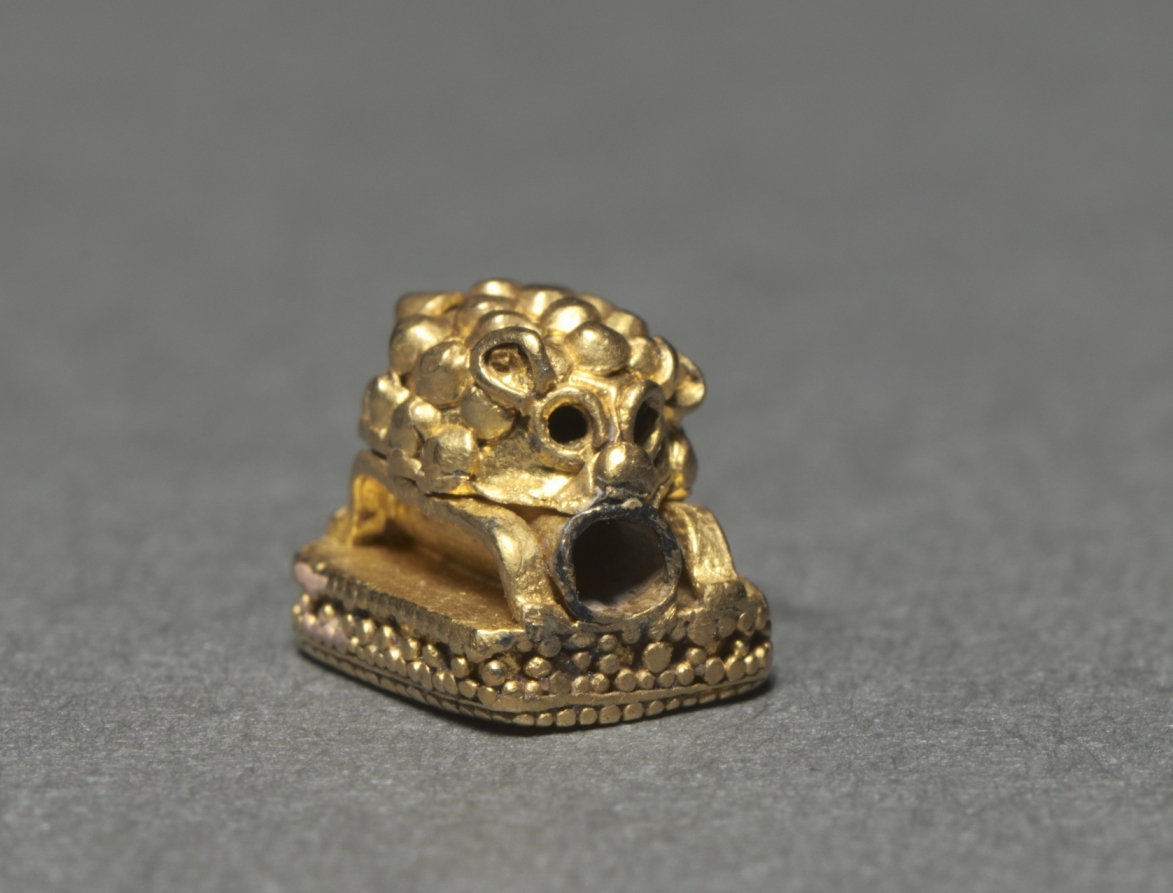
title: Hedgehog Jewelry Element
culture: Western Asia, Scythian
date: 400–200 BCE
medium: gold, soldered or fused with granulation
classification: Sculpture